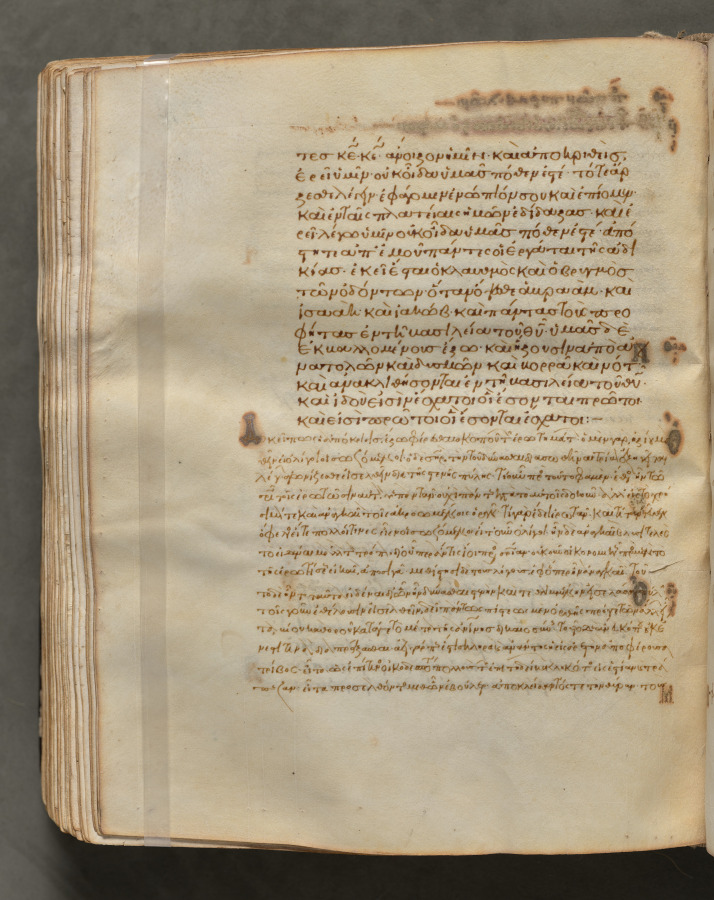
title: Text, folio 274 (verso), from a Gospel Book with Commentaries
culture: Byzantium, Constantinople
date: c. 1000–1100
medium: ink, tempera, and gold on vellum; leather binding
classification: Bound Volume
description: Each of the four gospels in this book opens on a page with brilliantly illuminated borders depicting the author of the text as well as birds—principally peacocks, symbols of the immortality of the soul—and fountains, representing the fountain of life and the salvation of the soul. This volume consists of 428 leaves with texts in Greek. Its level of sophistication suggests that it was probably written and decorated in a monastery in Constantinople.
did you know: Gospel books were carried in procession through Byzantine churches.